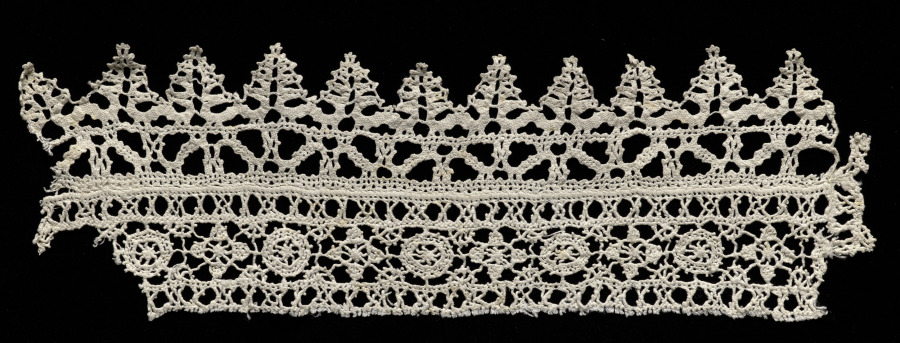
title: Lace Fragment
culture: Italy, 1600s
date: 1600s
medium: Linen: needle lace (Reticella) and bobbin lace edging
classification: Lace